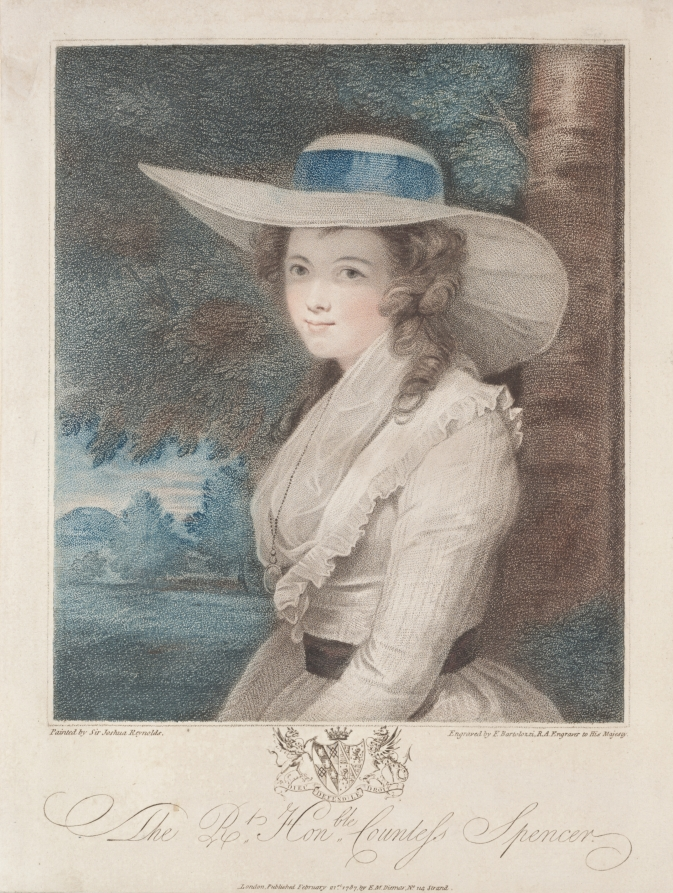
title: Countess Spencer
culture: England, 18th century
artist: Francesco Bartolozzi (British, 1727–1815)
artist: after Joshua Reynolds (British, 1723–1792)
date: 1787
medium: color stipple engraving and etching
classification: Print